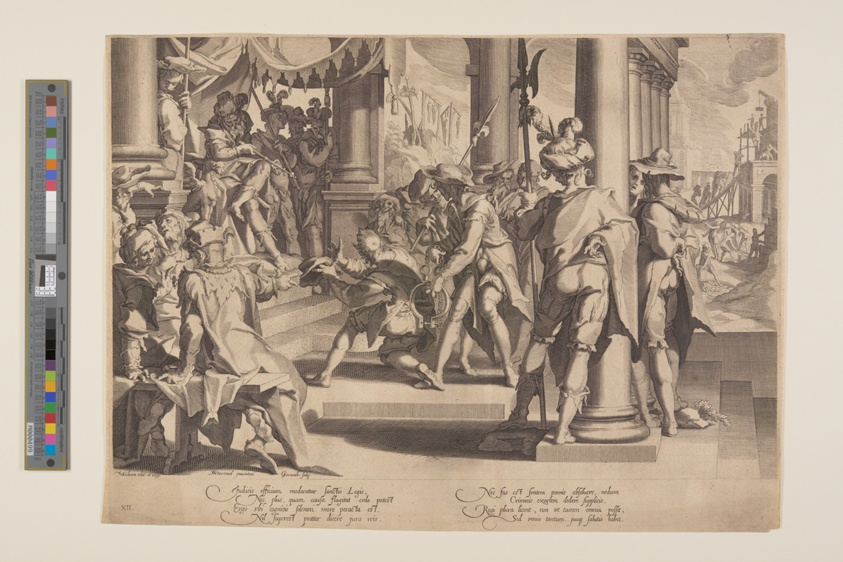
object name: Print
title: Allegory of Justice, Sanctity of Law, plate 12 from Thrones of Justice (Thronus Iustitiae)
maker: Willem van Swanenburgh (Dutch, 1580–1612); after Joachim Wtewael (Dutch, 1566–1638)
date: 1606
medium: Engraving on ivory laid paper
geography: Netherlands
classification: print; paper; prints and drawing; engraving